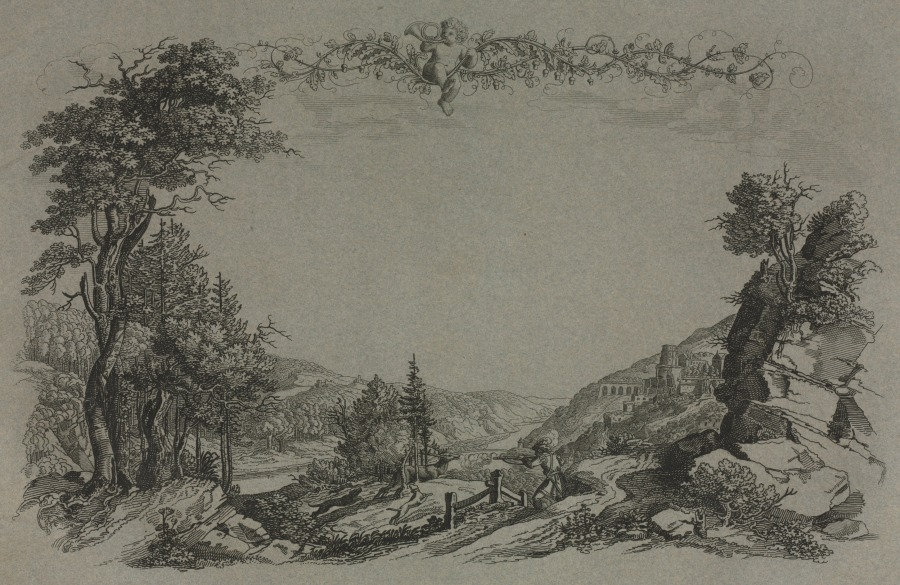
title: Six Views of Heidelberg Castle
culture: Germany, 19th century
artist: Ernst Fries (German, 1801–1833)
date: 1820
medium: grey paper wrapper for bound group of 6 lithographs with etched and engraved cover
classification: Print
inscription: Inscribed in German on recto in pen and brown ink with title and artist's name In print: Ansichten von Ruinen des Schlosses Heidelberg Fries Erst.